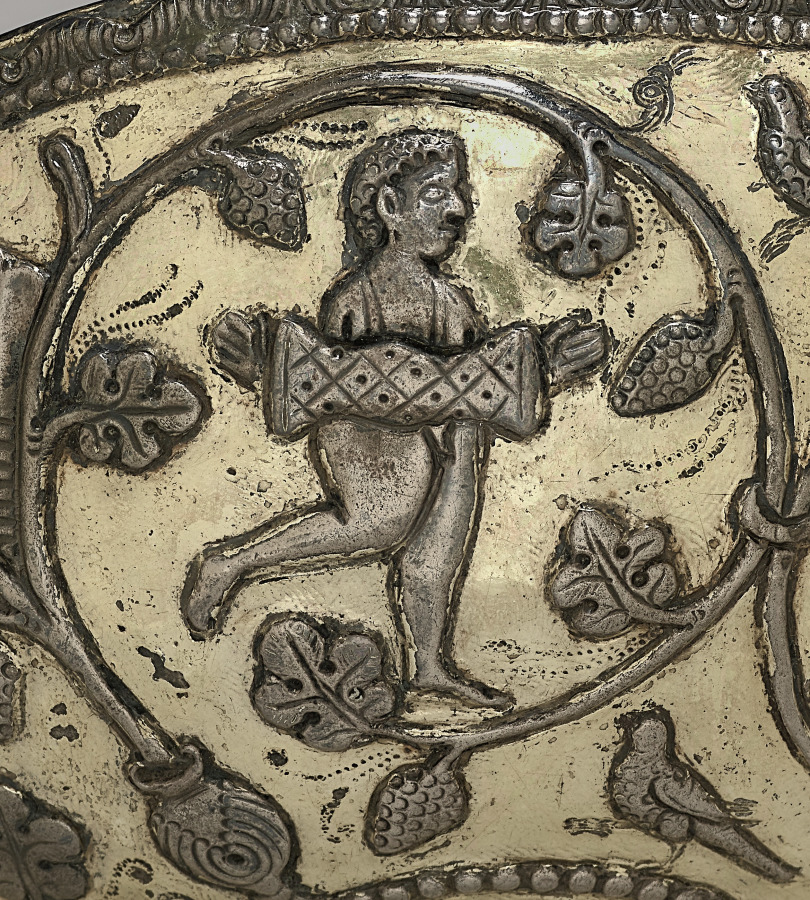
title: Bowl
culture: Iran, Sasanian Empire (224–651 CE)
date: 500–700 CE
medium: silver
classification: Metalwork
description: Every good Zoroastrian was supposed to spend one-third of his day farming; one-third philosophizing; and one-third eating, resting, and at pleasure. The abundance of Sasanian luxury goods is evidence of the importance accorded the last third of the day.